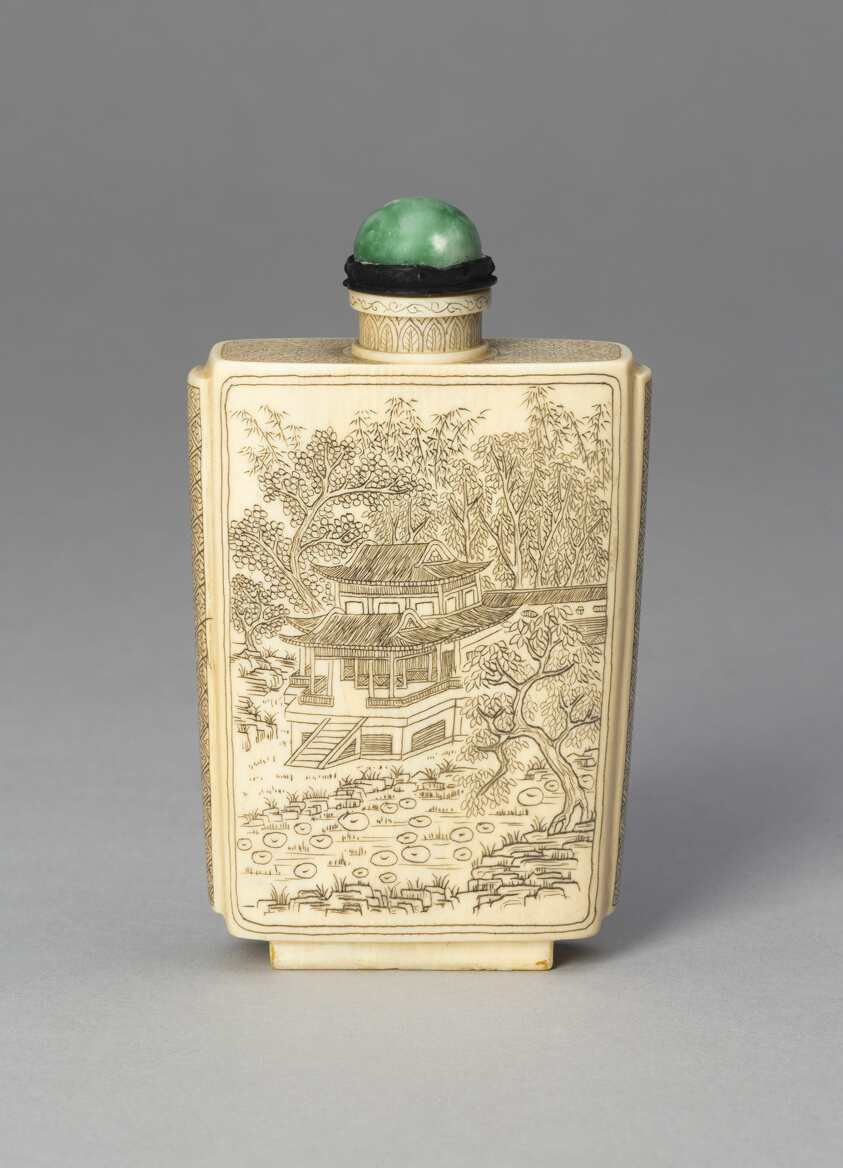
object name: Vessel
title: Snuff Bottle with Pavilions in a Bamboo Grove and Garden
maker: Japan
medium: Ivory with incised decoration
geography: Japan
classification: snuff bottle; ivory; asian art; vessel